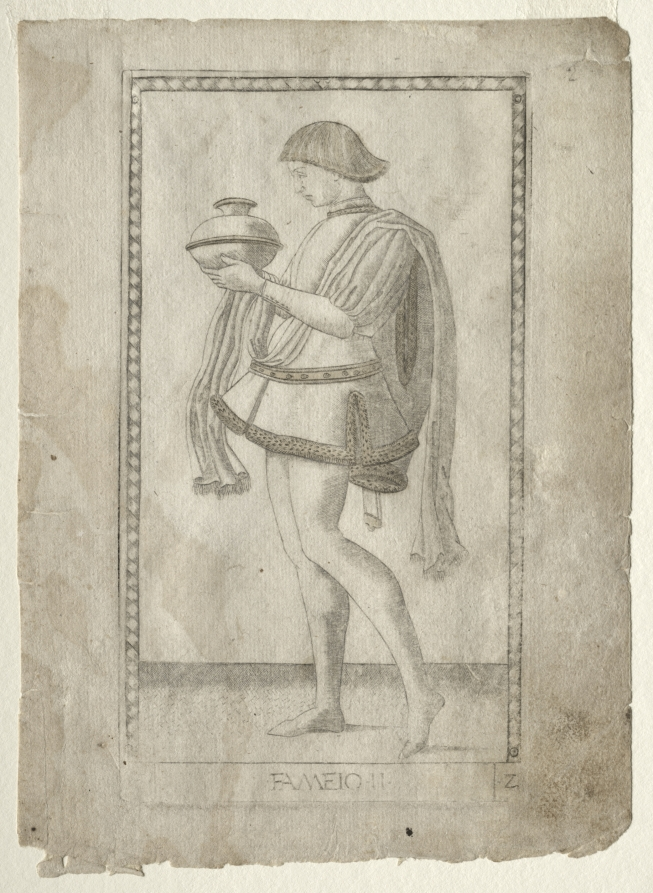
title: The Servant (from the Tarocchi, series E: Conditions of Man, #2)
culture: Italy, Ferrara, 15th century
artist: Master of the E-Series Tarocchi (Italian, active 1460s)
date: before 1467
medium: engraving hand-colored with gold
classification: Print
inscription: Lettered below the image of Fameio (The Servant): [E] / ·FAMEIO·II· / ·2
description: This engraving is part of the Tarocchi group marked with the letter “E,” and named Conditions of Man. This series outlines the social and hierarchical order of ten characters (Beggar, Servant, Artisan, Merchant, Gentleman, Knight, Doge King, Emperor, and Pope), starting from the lower grade and ending with the most important one. Here, Fameio (The Servant) is shown as a full-length male figure, standing in profile to the left. The elegantly dressed youth holds up a vessel and a piece of cloth.